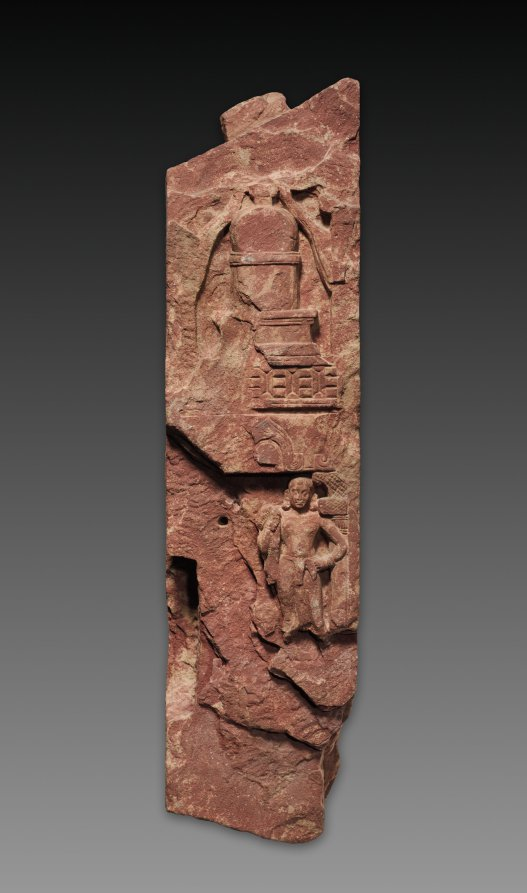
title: Railing Pillar with a Yakshi (Female Nature Divinity)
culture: Northern India, Mathura, Kushan period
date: c. 125–50 CE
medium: red sandstone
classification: Sculpture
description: This pillar would have been an upright of a stair banister, probably leading to an upper circumambulatory path of a Buddhist or Jain sacred monument known as a stupa. It has the image of a nature divinity grasping the branch of an ashoka tree with one hand and touching her breast full of nourishing milk with the other. The reverse side of the pillar is decorated with a stupa at the top and a partially damaged scene set in the architectural framework below.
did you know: Flowers of the ashoka tree (saraca asoca) are bright red.